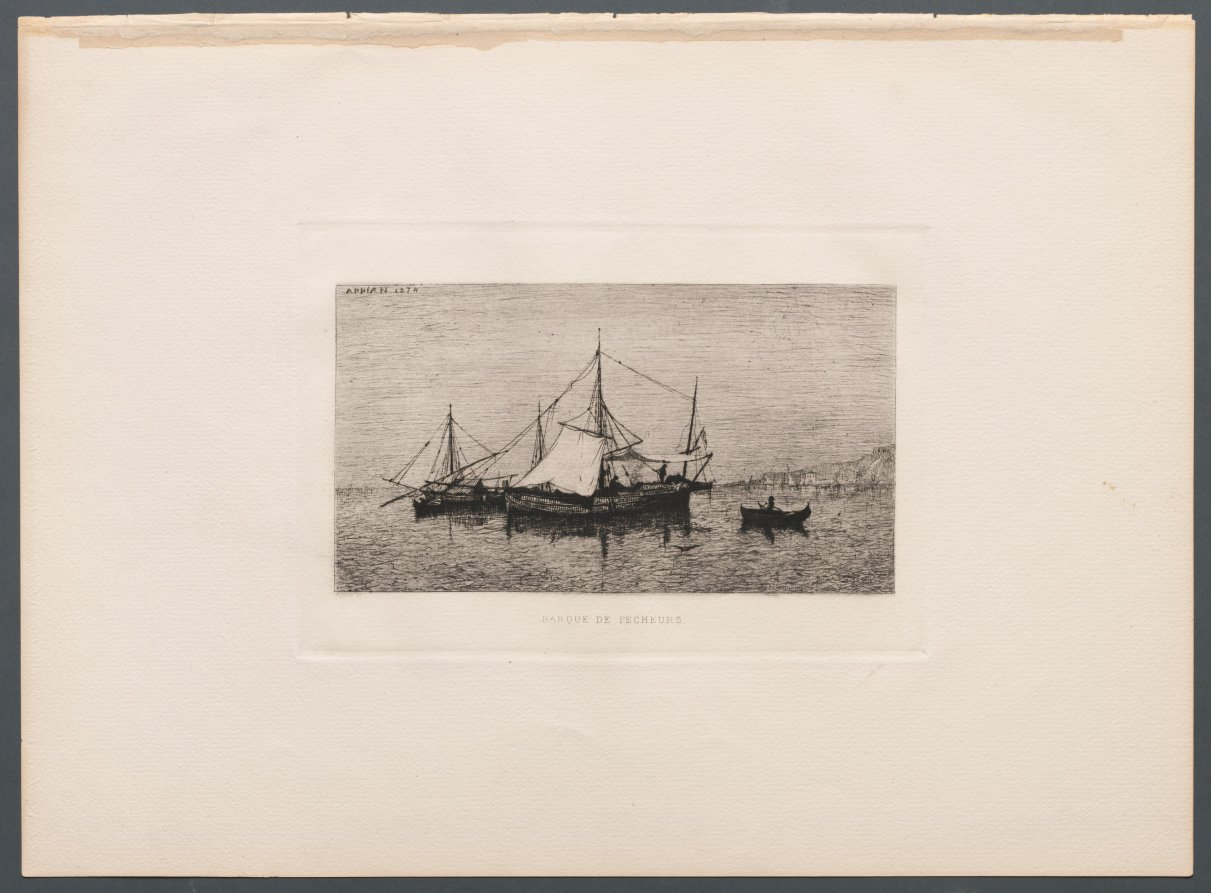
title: Fishing Boat/Coastal Shipping Boat (Italian Coast) (Barque de Pecheurs/Barque de Cabotage (Côtes d'Italie)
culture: France, 19th century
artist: Adolphe Appian (French, 1818–1898)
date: 1874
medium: etching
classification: Print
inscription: inscribed upper left in plate: APPIAN 1874